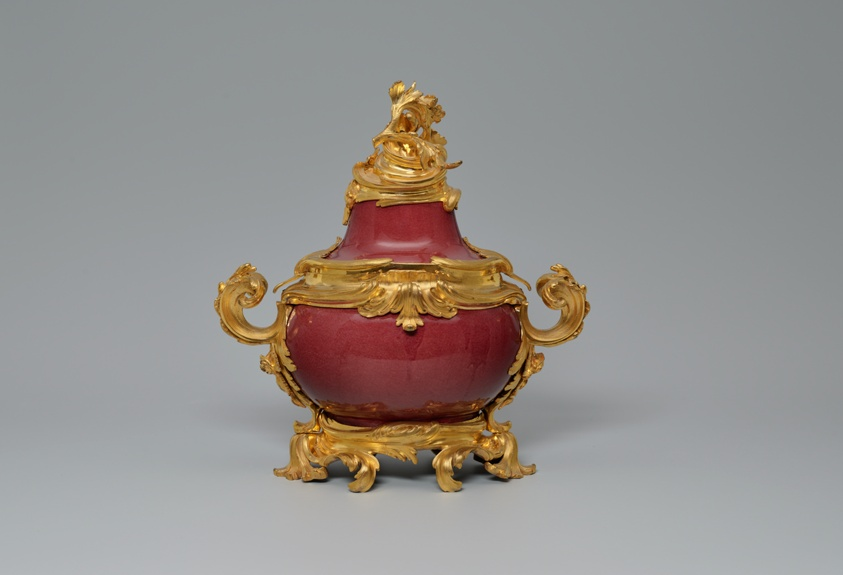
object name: Ceramics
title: Pair of Mounted Vases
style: Rococo, 18th Century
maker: China; Mounts attributed to Jean-Claude Duplessis (French, c. 1695–1774)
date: c. 1750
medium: Hard paste porcelain and gilt bronze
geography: China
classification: vase; france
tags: ormolu, China, foliage